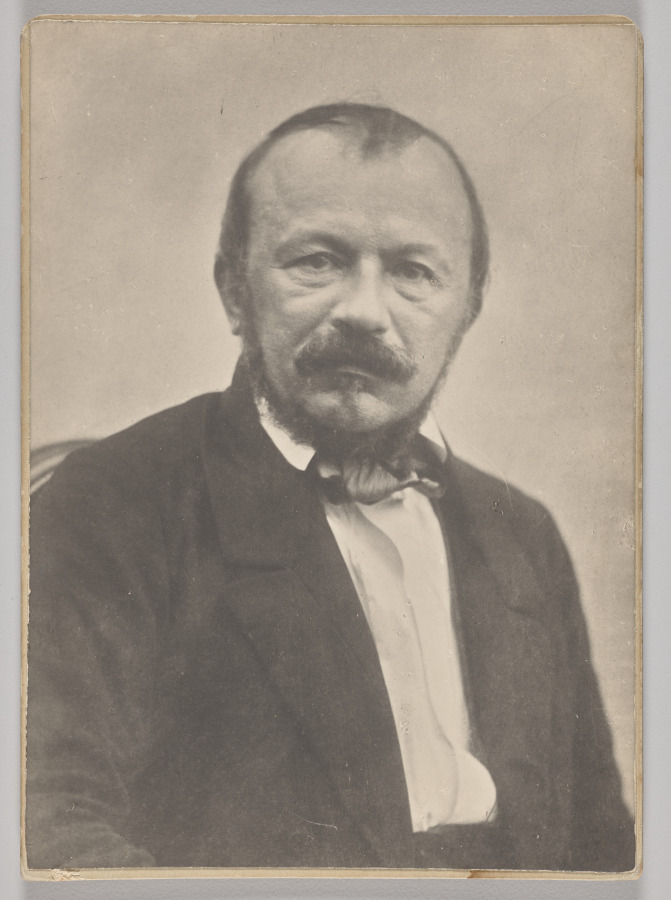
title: Gérard de Nerval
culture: France, 19th century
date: 1850s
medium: albumen print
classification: Photograph